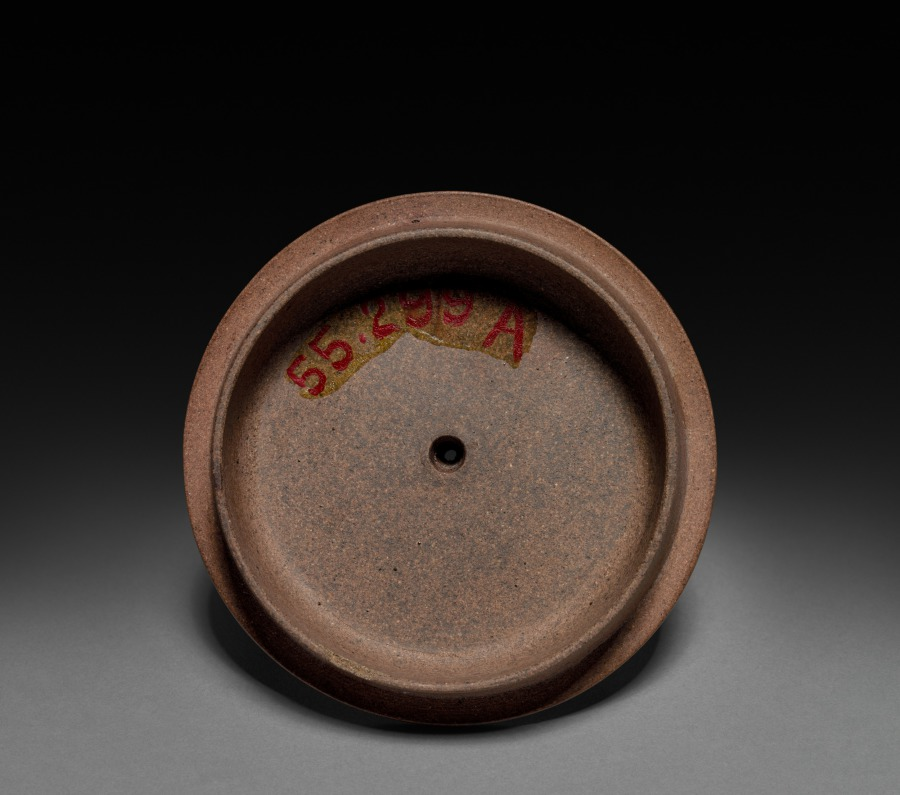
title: Teapot: Yixing ware (lid)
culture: China, Qing dynasty (1644-1911)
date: 1644–1911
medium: stoneware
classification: Ceramic